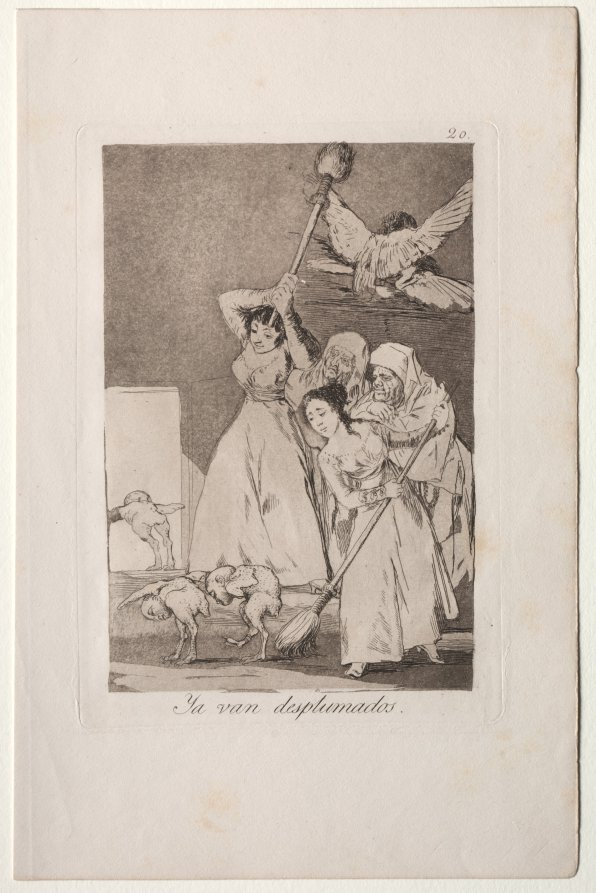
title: There They Go Plucked, Plate 20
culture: Spain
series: Los Caprichos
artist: Francisco de Goya (Spanish, 1746–1828)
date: 1799 (printed c. 1855)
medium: etching and aquatint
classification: Print